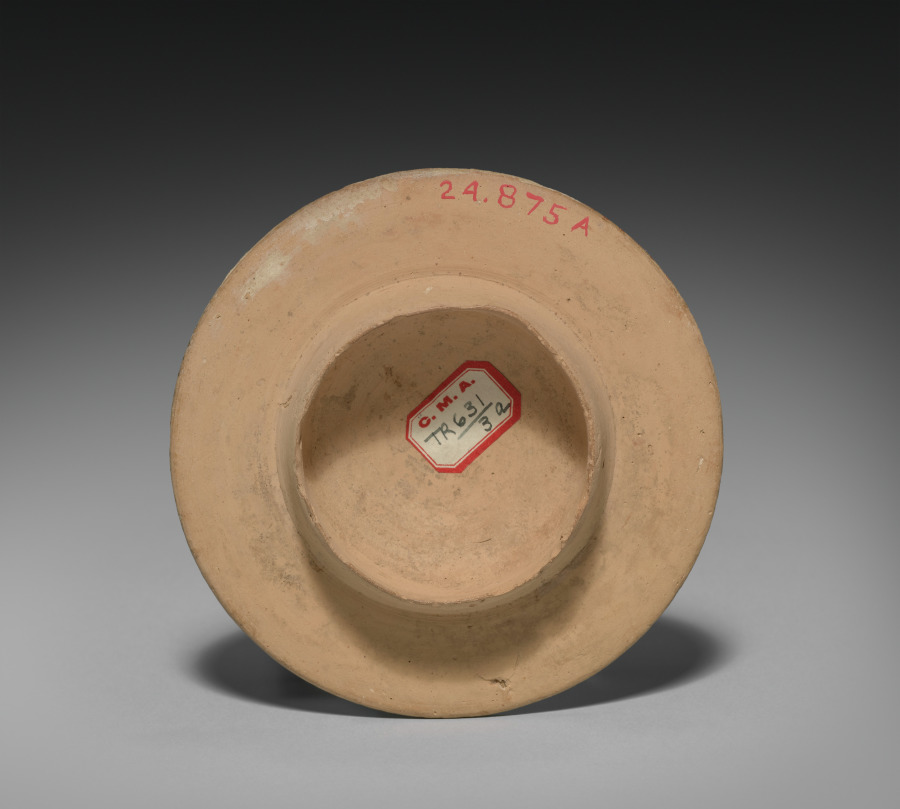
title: Corinthian Vase (lid)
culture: Greece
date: 600s BCE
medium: earthenware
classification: Ceramic